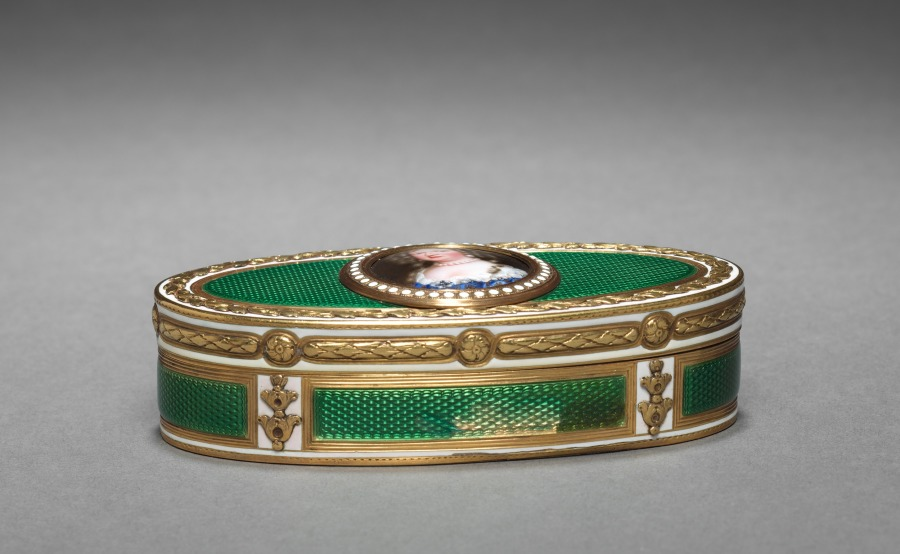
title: Snuff Box (Tabatière) with Portrait of Marie-Thérèse of Austria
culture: France, 18th century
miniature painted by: Jean Petitot (Swiss, 1607–1691)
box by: Charles Le Bastier (French)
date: miniature, c. 1676; box, 1775–76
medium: Gold, enamel, and miniature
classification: Enamel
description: In 18th-century France, ornately enameled boxes that held snuff—powdered tobacco—became a popular accessory in the French court. This box is decorated with a miniature portrait of Marie-Thérèse of Austria, the queen consort of French King Louis XIV. Their union was largely political. A year into their marriage Louis XIV took an official mistress, Madame Pompadour.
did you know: This box resulted from the combined efforts of the popular portrait painter who served the court of French King Louis XIV, Jean Petitot, and master goldsmith Charles Le Bastier.